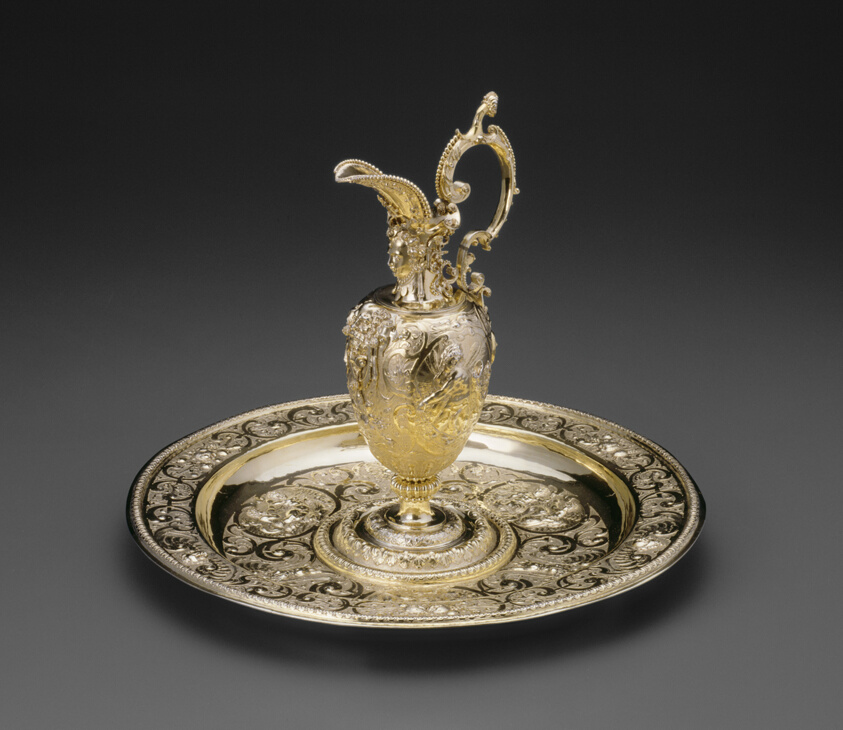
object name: Decorative Arts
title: Rosewater Ewer and Basin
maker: Franz Dotte, active c. 1595-1600; Germany, Nuremberg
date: 1603/1609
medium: Silver gilt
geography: Nuremberg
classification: silver; metalwork; european decorative arts; decorative arts